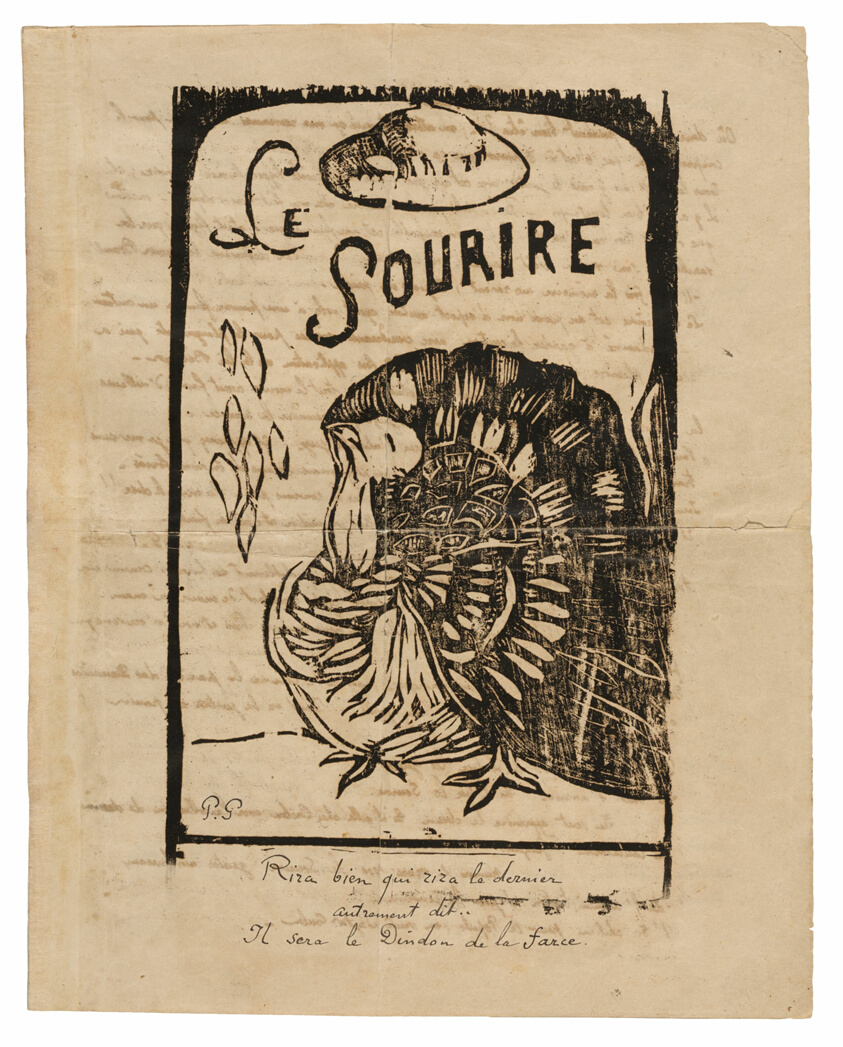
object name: Print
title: Le sourire: Journal méchant, Mar. 1900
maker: Paul Gauguin (French, 1848-1903)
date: 1900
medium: Mimeograph in brownish-black ink, with wood-block print in black ink on cream wove paper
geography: France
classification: woodcut; print; prints and drawing